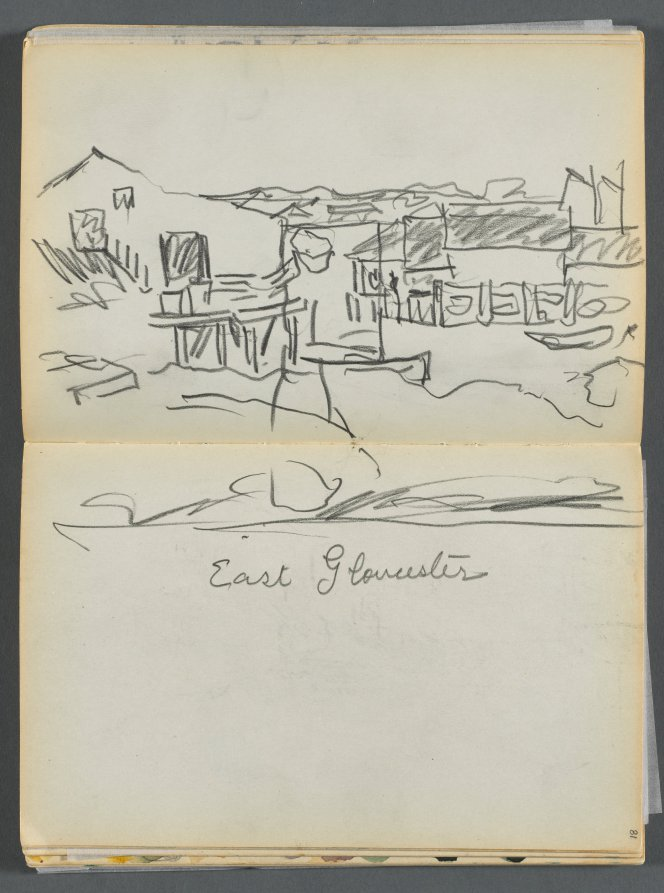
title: Sketchbook- The Granite Shore Hotel, Rockport, page 080 & 81: "East Gloucester"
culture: America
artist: Maurice Prendergast (American, born Newfoundland [now Canada], 1858–1924)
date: 1905–10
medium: graphite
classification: Bound Volume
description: This sketchbook contains 72 pages of pencil drawings and 9 watercolors of Cape Ann. On the inside of the cover Prendergast wrote the address of the Granite Shore Hotel in Rockport, Massachusetts.